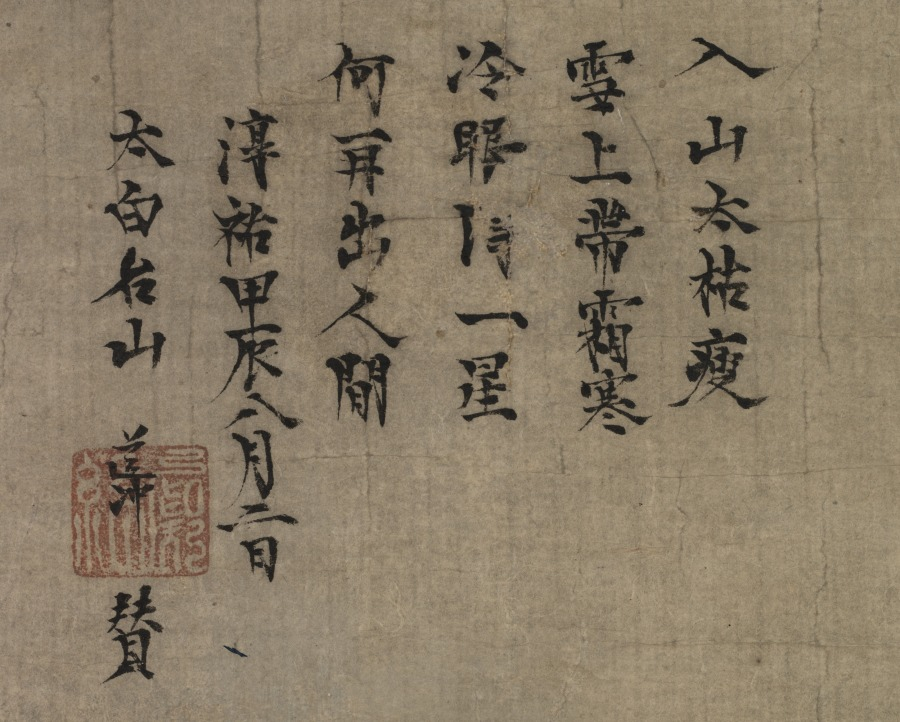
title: Shakyamuni Emerging from the Mountains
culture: China, Southern Song dynasty (1127-1279)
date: 1244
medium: hanging scroll; ink on paper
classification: Painting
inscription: 入山太枯瘦，雪上帶霜寒。 冷眼得一星，何再出人間。 淳祐甲辰八月二日 太白名山 道冲 贊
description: Shakyamuni emerged from the mountains after years of ascetic practices, which anticipated his sermon in Deer Park and attainment of enlightenment under the bodhi tree. However, this figure of Shakyamuni can be interpreted as having already achieved enlightenment and reentered the earthly world to spread the dharma (Buddhist law). Chijue Daoching’s inscription mentions his indifferent glance at the morning star, suggesting nonattachment: Entering the mountains he was much too thin and withered. The snow is overlaid with frost—it is cold. Casting an indifferent glance, he saw a [morning] star. Why should he once again emerge among the world of men.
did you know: The painting was inscribed by the abbot of Jingde Temple 景德寺 of Mount Tiantong 天童山 near Ningbo 寧波.